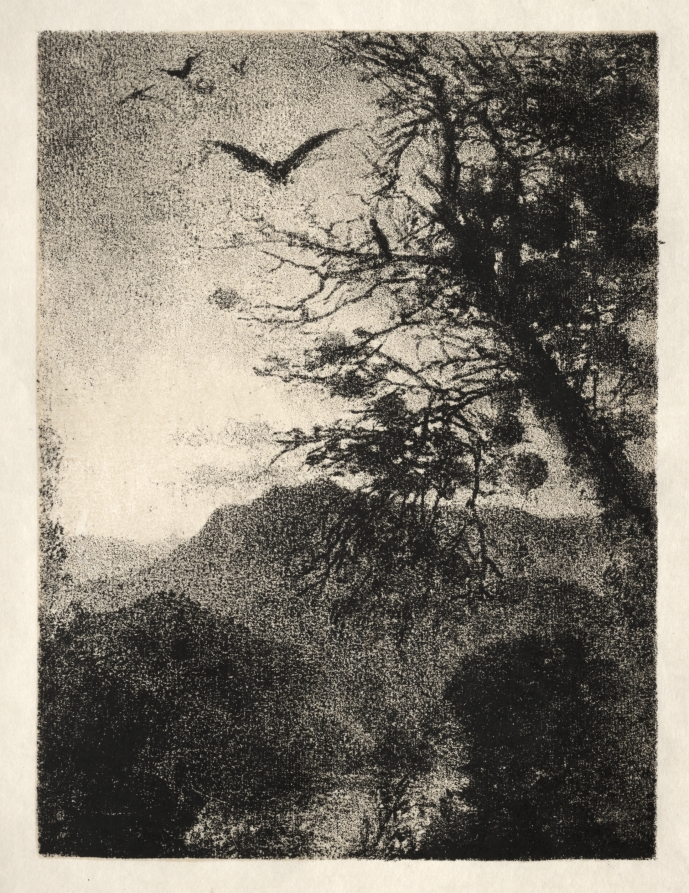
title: The Eagles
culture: France, 20th century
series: Centaure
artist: Ker Xavier Roussel (French, 1867–1944)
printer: Auguste Clot (French, 1858–1936)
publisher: Ambroise Vollard (French, 1867–1939)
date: 1926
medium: lithograph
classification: Print